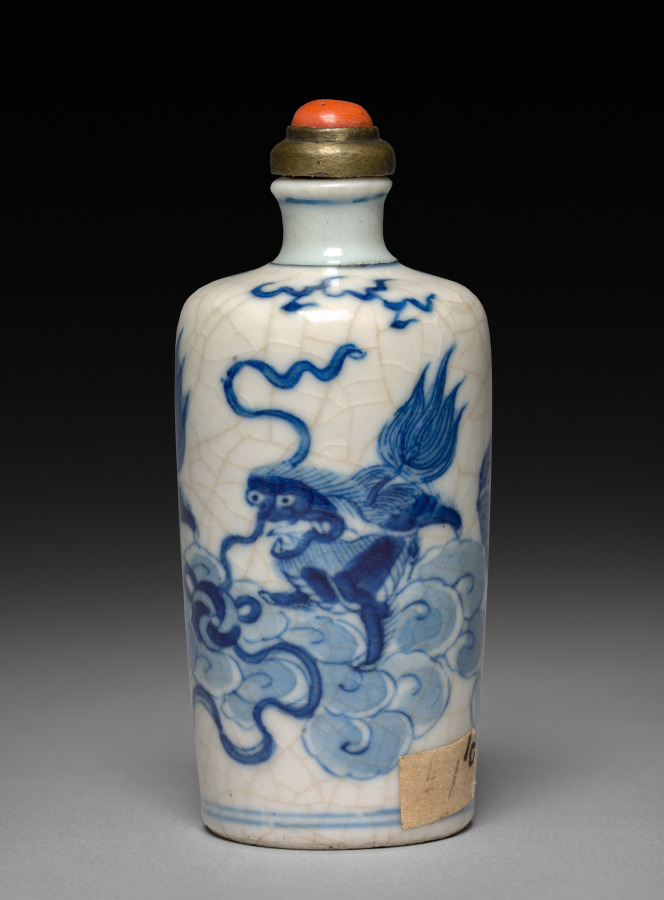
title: Snuff Bottle with Stopper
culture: China, Jiangxi province, Jingdezhen kilns, Qing dynasty (1644-1911), Yongzheng reign (1722-35)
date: 1723–35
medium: porcelain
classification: Ceramic